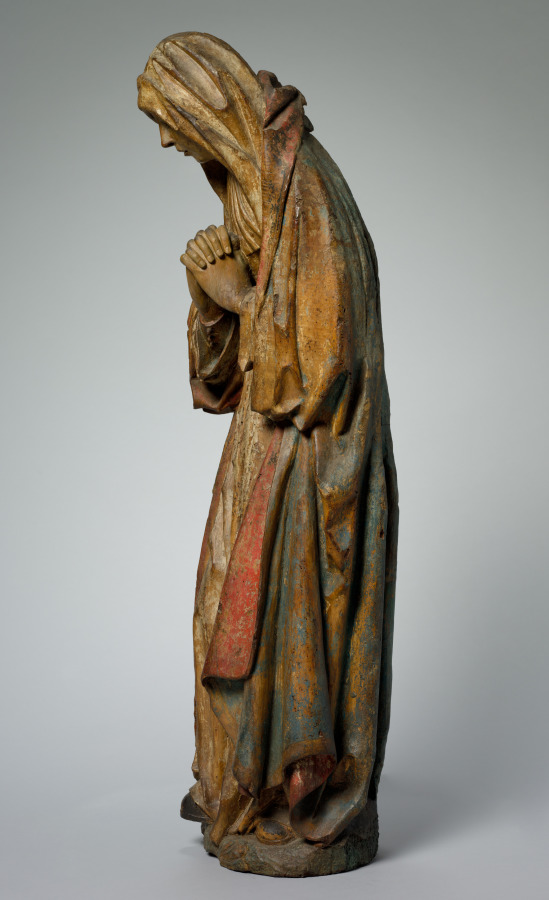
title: Virgin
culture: France, Champagne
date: 1510–15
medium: painted oak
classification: Sculpture